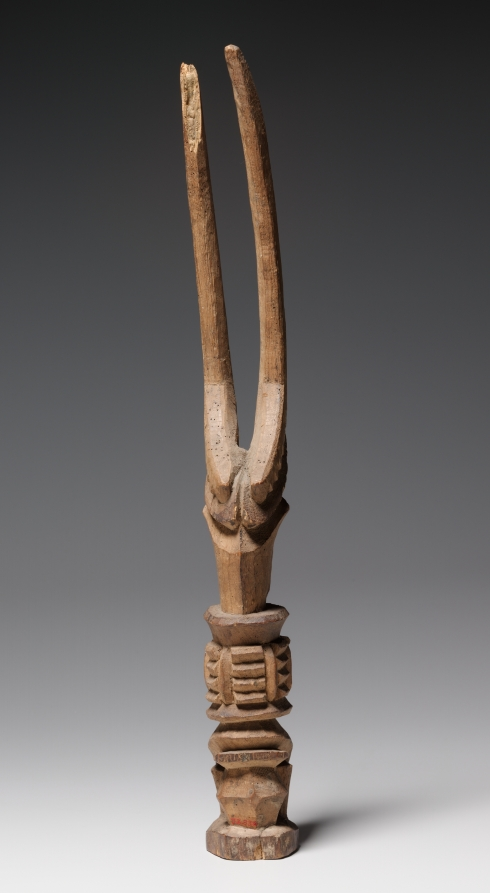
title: Shrine Figure (Ikenga)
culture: Africa, West Africa, Nigeria, Igbo style, unknown carver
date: early 1900s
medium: wood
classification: Sculpture